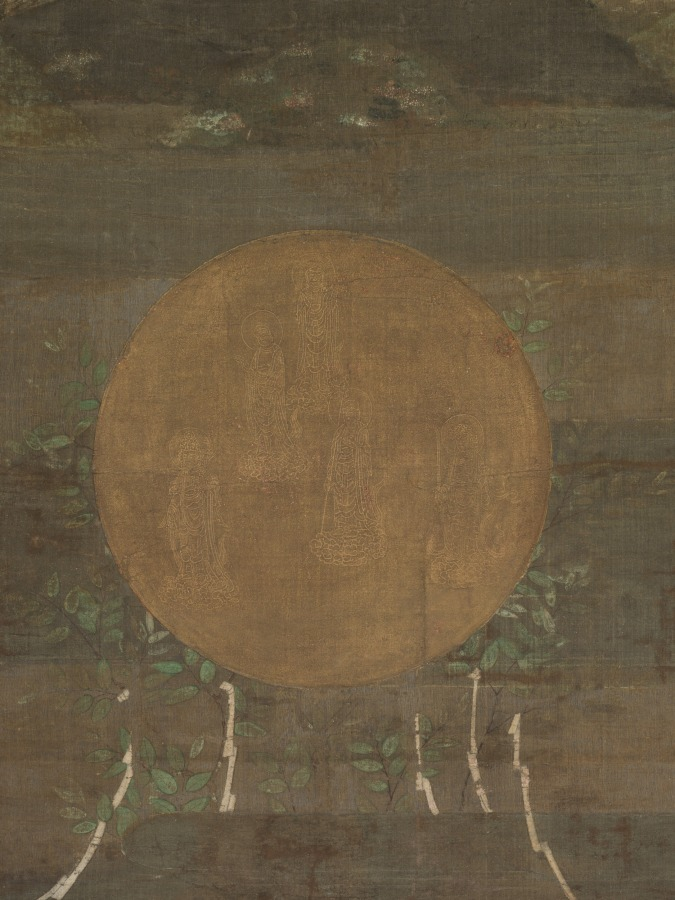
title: Departure from Kashima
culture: Japan, Nanbokuchō period (1336–92)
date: 1336–92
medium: hanging scroll; ink and color on silk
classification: Painting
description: The kami Takemikazuchi from Kashima (in present-day Ibaraki Prefecture) departs on a white deer for Mount Mikasa in Nara, where he takes up residence. The five Kasuga kami are presented within a golden circle supported by the branches of a sakaki tree, from which trail five white paper streamers—indicating the purity and sacredness of the five shrine halls of the complex—as well as blossoming wisteria vines, a symbol of the Fujiwara family. The two figures walking along near the stag’s back legs are Nakatomi no Tokifū and his younger brother Hidetsura, who have followed Takemikazuchi and become priests of Kasuga Taisha.